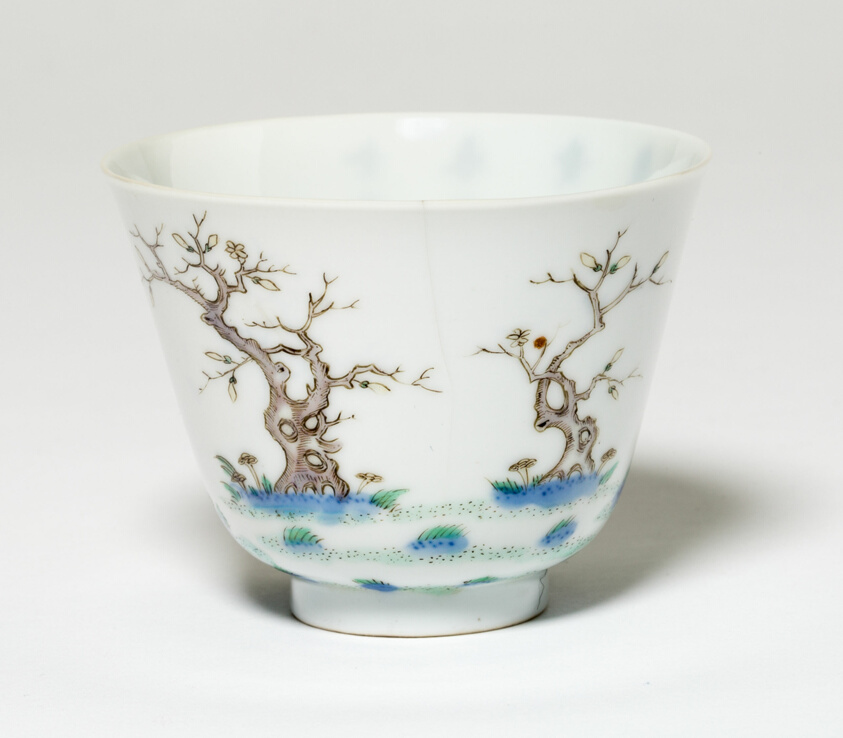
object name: Vessel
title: Cup with Orchid Tree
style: Chinese (culture or style)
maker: China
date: Qing dynasty (1644–1911), Kangxi reign mark and period (1662–1722)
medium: Porcelain with underglaze blue and overglaze enamel decoration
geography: China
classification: drinking vessel; porcelain; asian art; ceramics; vessel